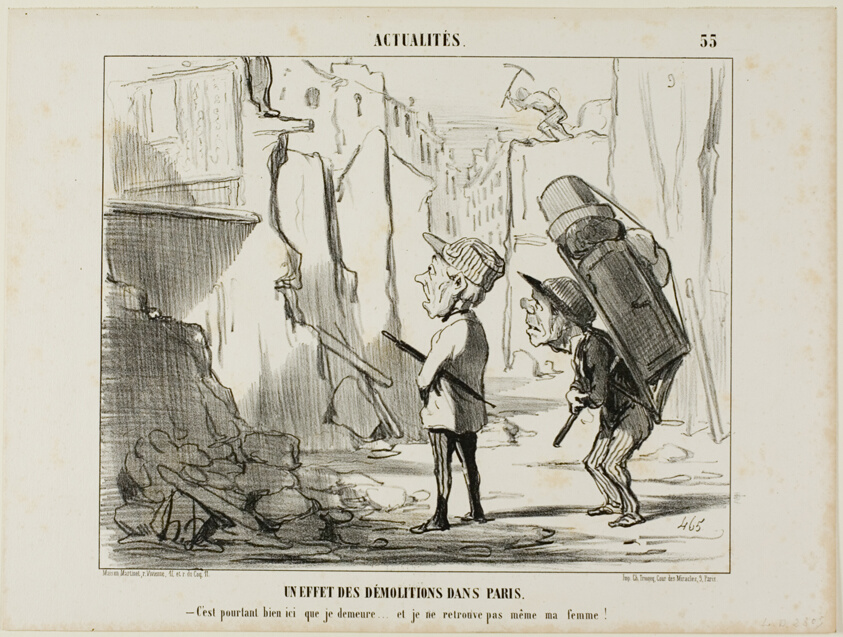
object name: Print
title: Result of the Demolishing of Buildings in Paris. “- After all, this is where I used to live.... and I can't even find my wife anymore,” plate 55 from Actualités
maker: Honoré Victorin Daumier; French, 1808-1879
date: 1852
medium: Lithograph in black on white wove paper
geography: France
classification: lithograph; print; prints and drawing